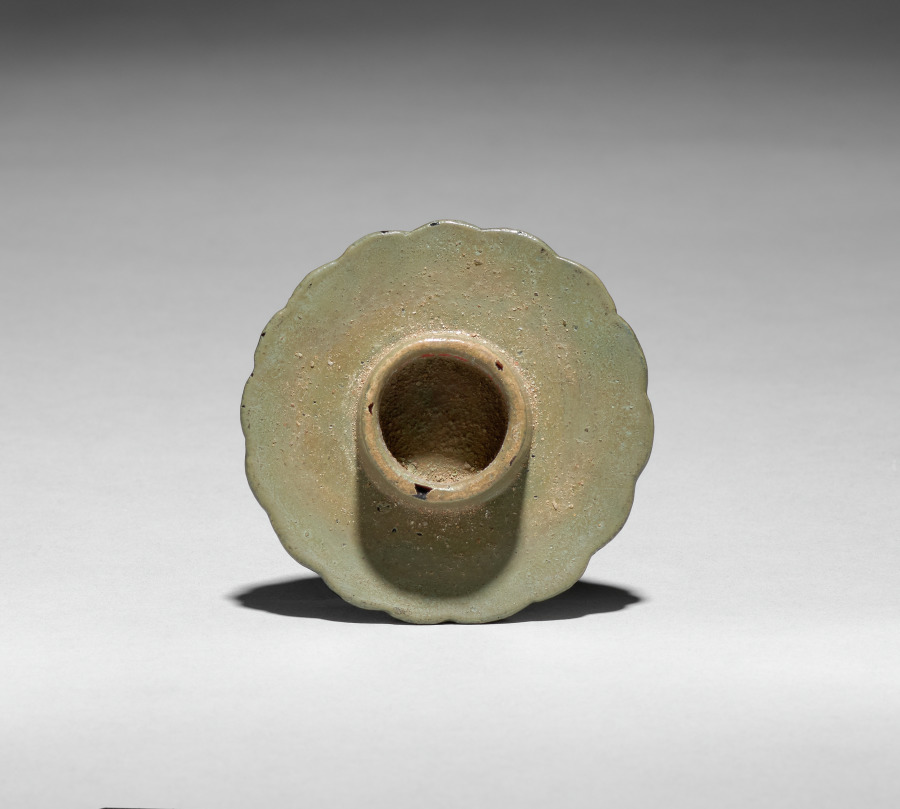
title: Wine Pot (lid)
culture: Korea, Goryeo dynasty (918–1392)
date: 918–1392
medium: pottery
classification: Ceramic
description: As early as the seventh century, the practice of drinking tea and wine became an important part of elite culture in Korea. Elites of the Goryeo period commissioned a variety of types of utensils and vessels including this elegant pot, not only to make their drinking experience more exciting, but also to show their appreciation of nature.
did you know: Originally the lid was not coupled with this pot.